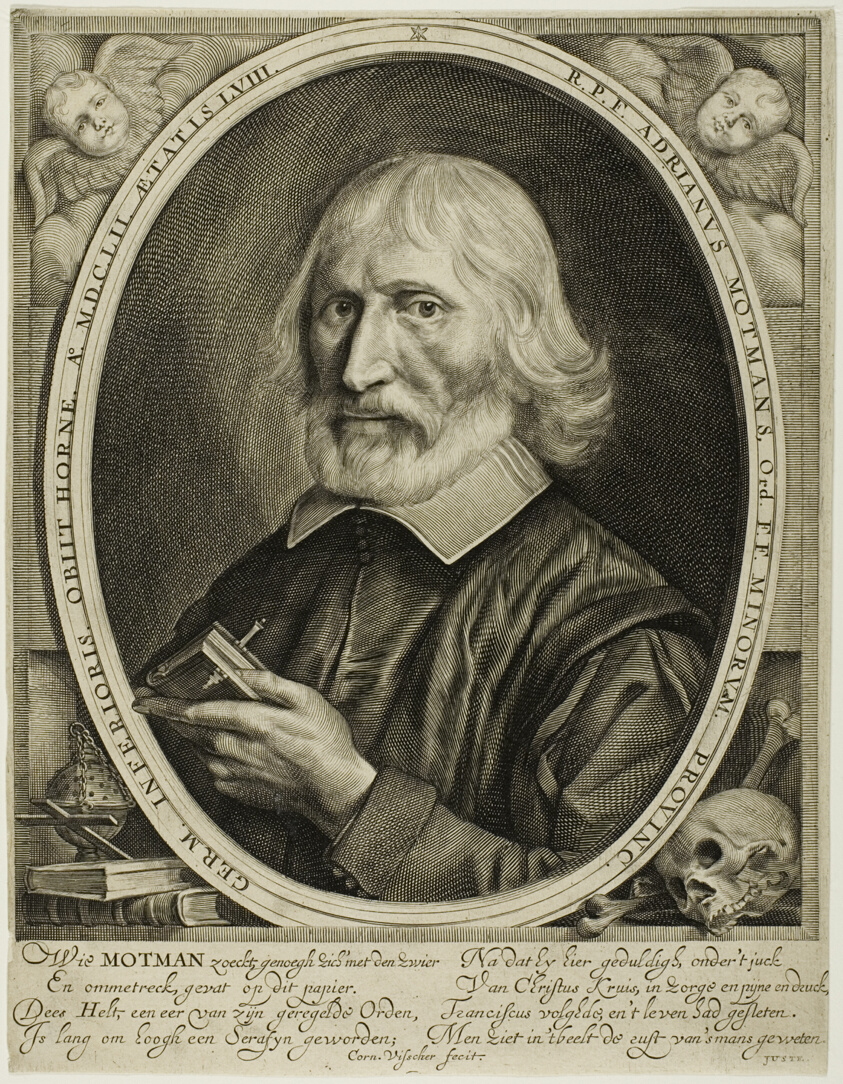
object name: Print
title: Adriaen Motmans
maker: Cornelis Visscher (Dutch, c. 1629-1658)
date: c. 1649-58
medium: Engraving on paper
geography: Holland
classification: engraving; print; prints and drawing